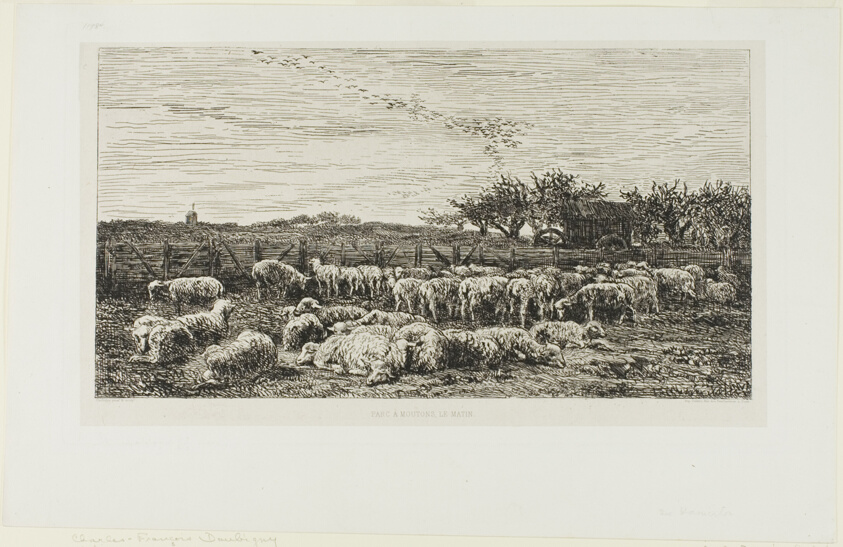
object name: Print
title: Meadow with sheep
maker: Charles François Daubigny (French, 1817-1878)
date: 1860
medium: Etching on light gray chine laid down on white wove paper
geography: France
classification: etching; print; prints and drawing